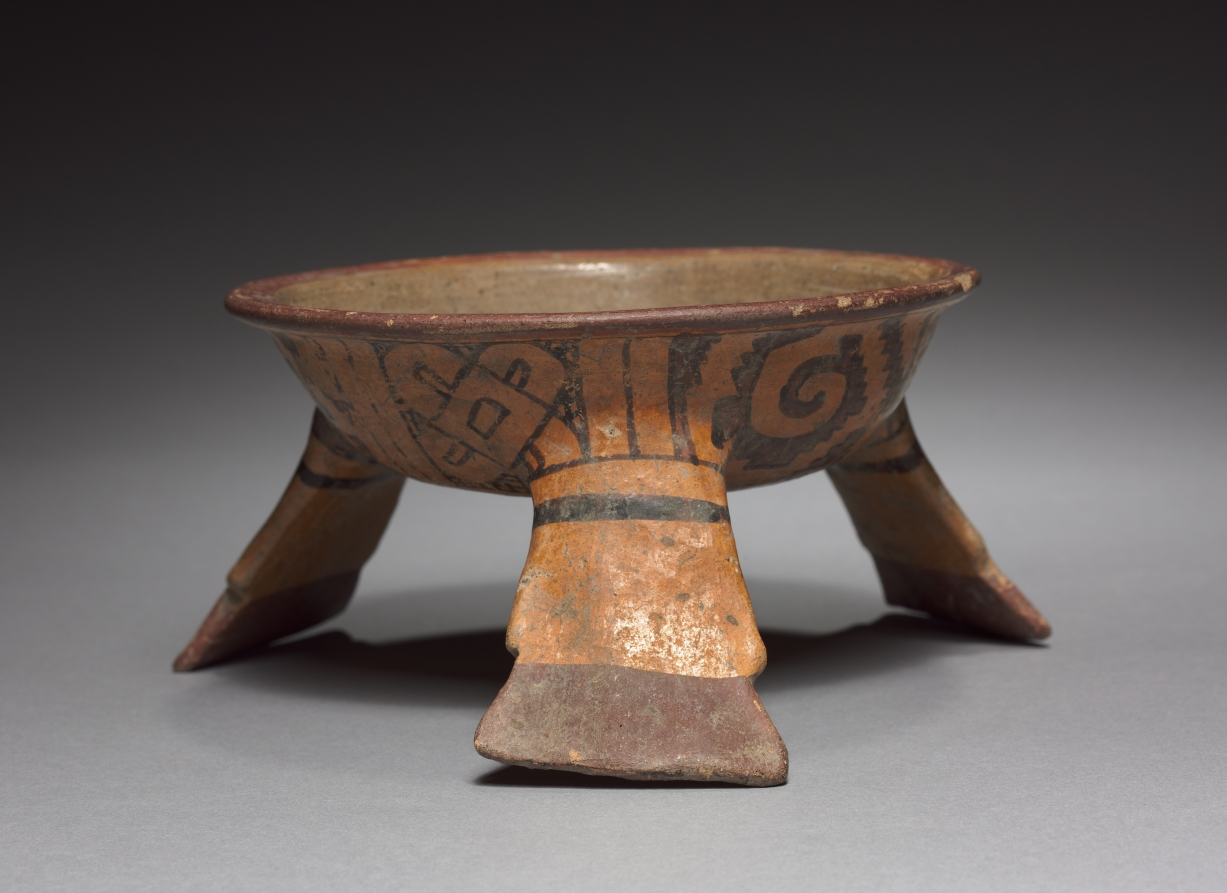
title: Tripod Bowl with Painted Underside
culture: Mexico, Oaxaca, Mixtec, 13th-16th century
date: 1200–1519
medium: pottery with burnished, colored slips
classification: Ceramic